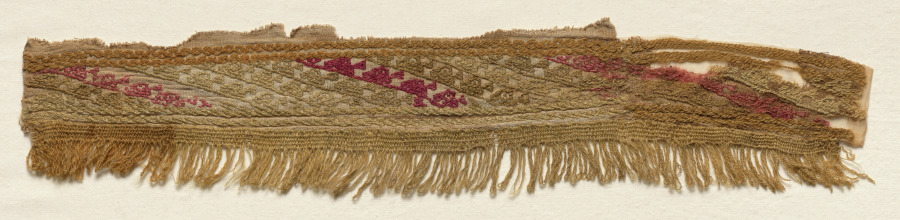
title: Three Border Fragments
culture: Peru, Central Coast, Chancay, 12th-15th century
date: c. 1100–1400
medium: tabby, brocaded; cotton and wool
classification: Textile